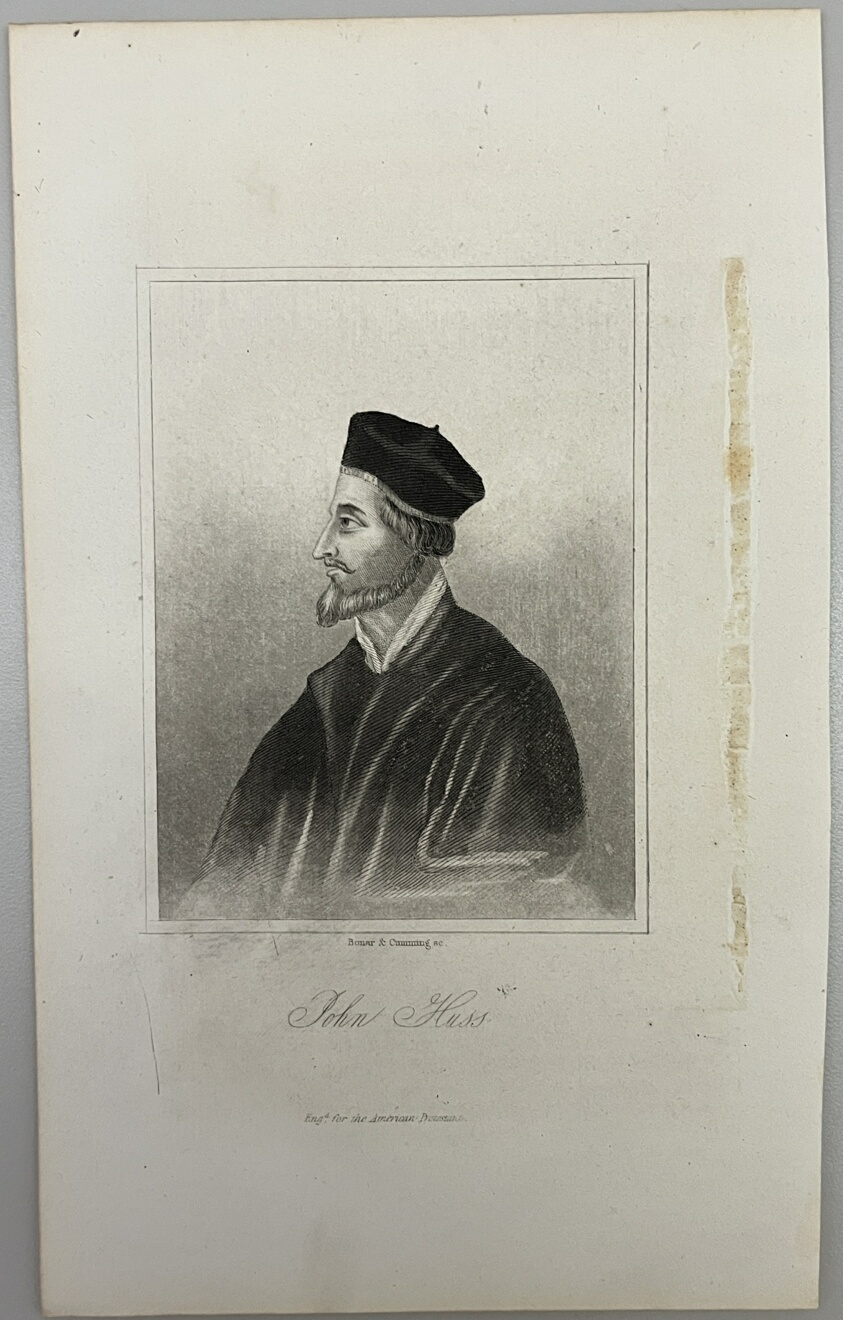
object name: Print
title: John Huss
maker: Thomas Bonar (American, 19th century); and Bonar & Cumming (American, 19th century)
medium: Steel engraving on paper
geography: United States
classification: reproduction; print; prints and drawing